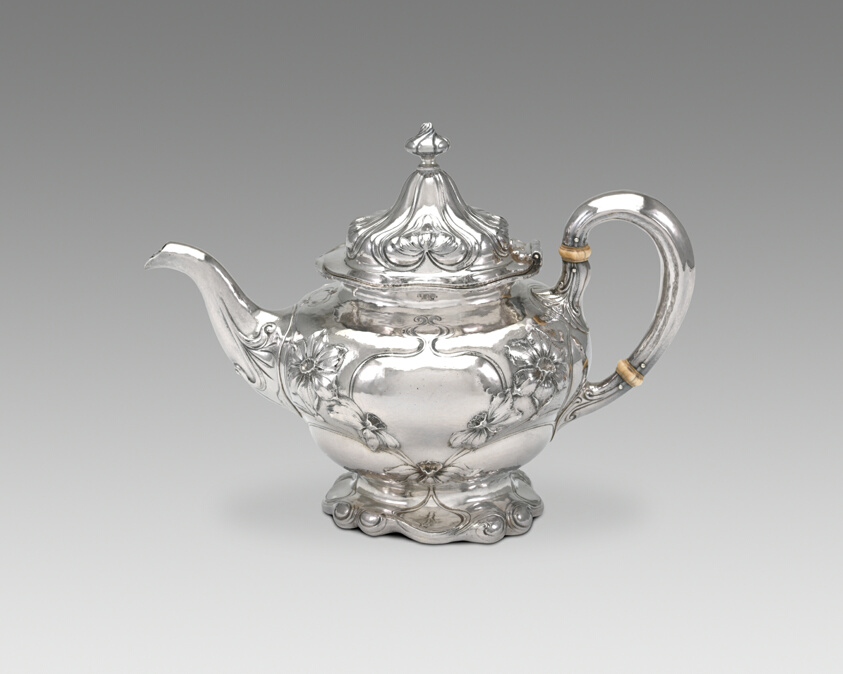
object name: Metalwork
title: Teapot (part of a set)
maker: Gorham Manufacturing Company (American, founded 1831); Providence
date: 1900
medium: Silver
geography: Providence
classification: teapot; silver; american decorative arts; american arts; decorative arts